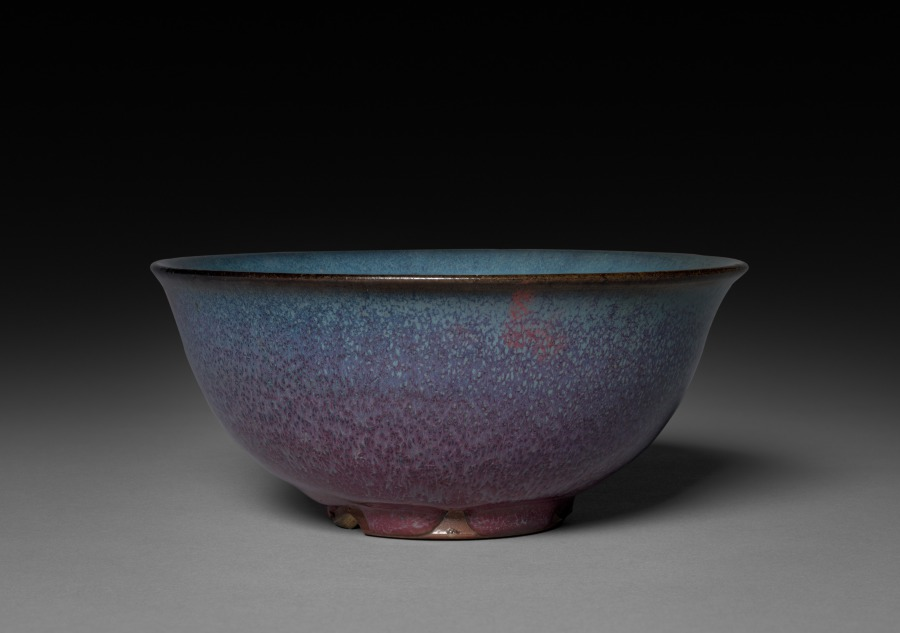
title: Bowl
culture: North China, Yuan dynasty (1271-1368) - Ming dynasty (1368-1644)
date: 1300s–1400s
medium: Glazed gray stoneware, Jun ware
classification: Ceramic